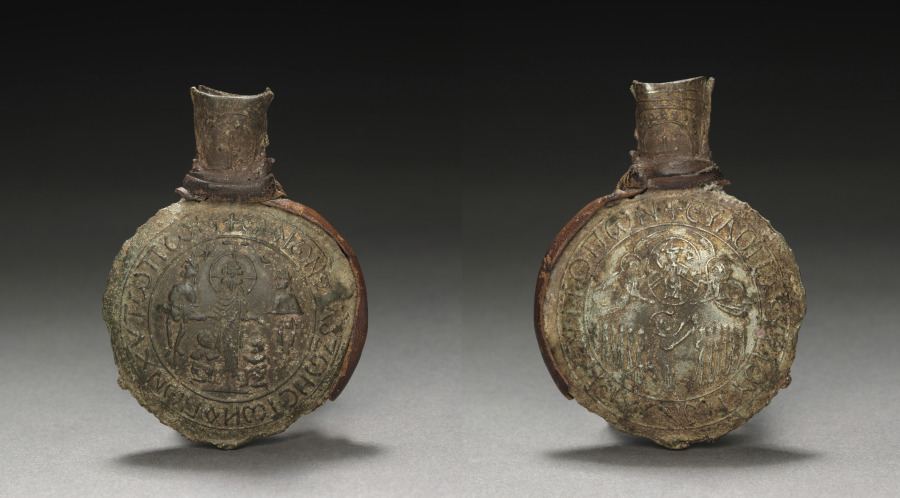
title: Pilgrim's Ampulla with Scenes of the Crucifixion (front) and the Ascension (back)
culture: Byzantium, Palestine, early Byzantine period, early 7th Century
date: c. 600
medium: tin-lead alloy with leather fragments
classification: Metalwork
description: The images found on the sides of surviving lead pilgrims' ampullae include scenes relating to the life of Christ, and by extension to the holy sites (loca sancta) where the events took place. Cast into the sides of this ampulla are scenes of Christ's Crucifixion and Ascension. The use of such sacred images on these vessels illustrates the early Christian belief that images were carriers of divine power. This ampulla is known as a "Monza" or "Bobbio" type after caches of similar examples discovered in those two Italian towns.